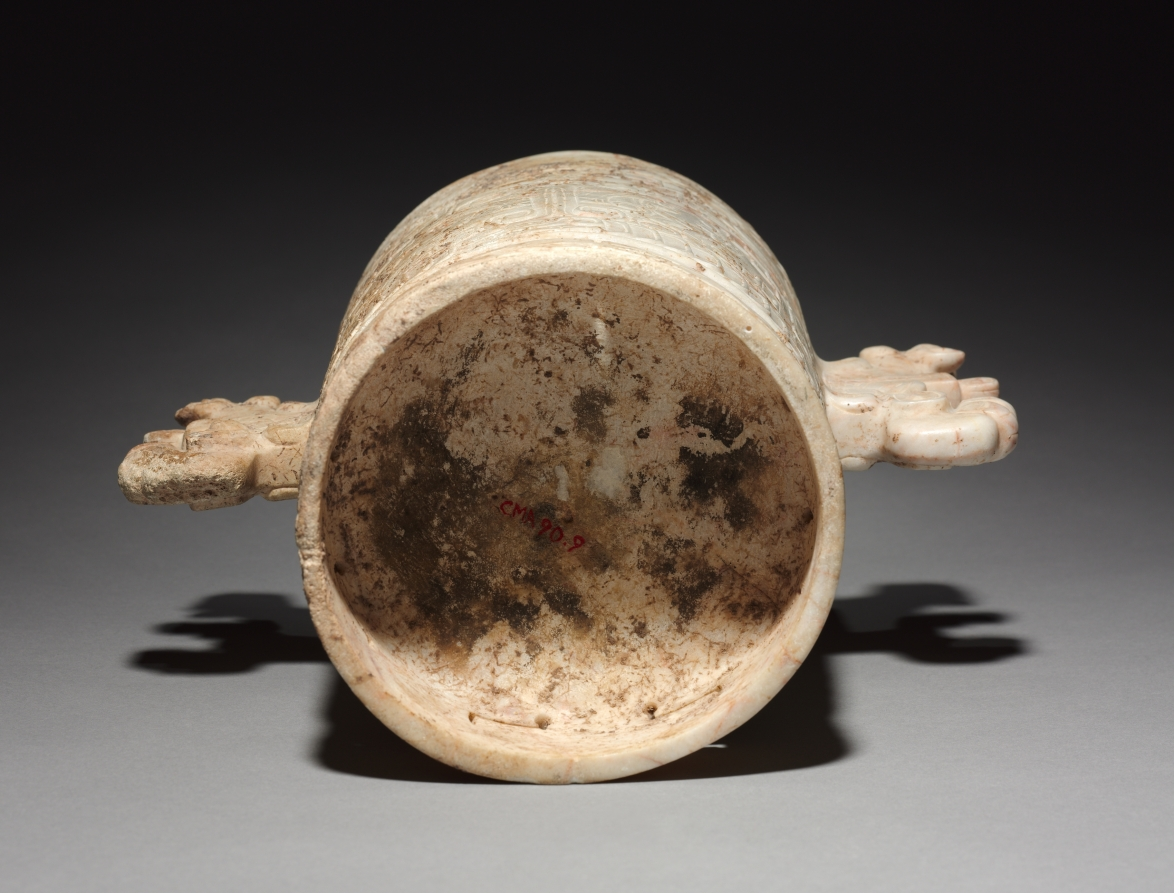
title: Carved Stone Vessel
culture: Northwest Honduras, Ulúa Valley, 8th-10th century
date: 700–1000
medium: marble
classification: Sculpture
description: This stone vessel, made by eastern neighbors of the Maya, is one of the finest and largest of its kind. On the exterior are several motifs that combine to create an unusually complex design that features a grotesque head, either in profile or front-facing, with a leg near its mouth. In the main panel a frontal version of the head hovers over two legs, the knees pointed sharply outward. Beside each leg is a lively human, rarely seen in such works. Little is known about the motifs’ meanings or the vessel’s use.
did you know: Carved in the round, the vessel's handles suggest a feline that emerges from a serpent-like head with an upturned snout.